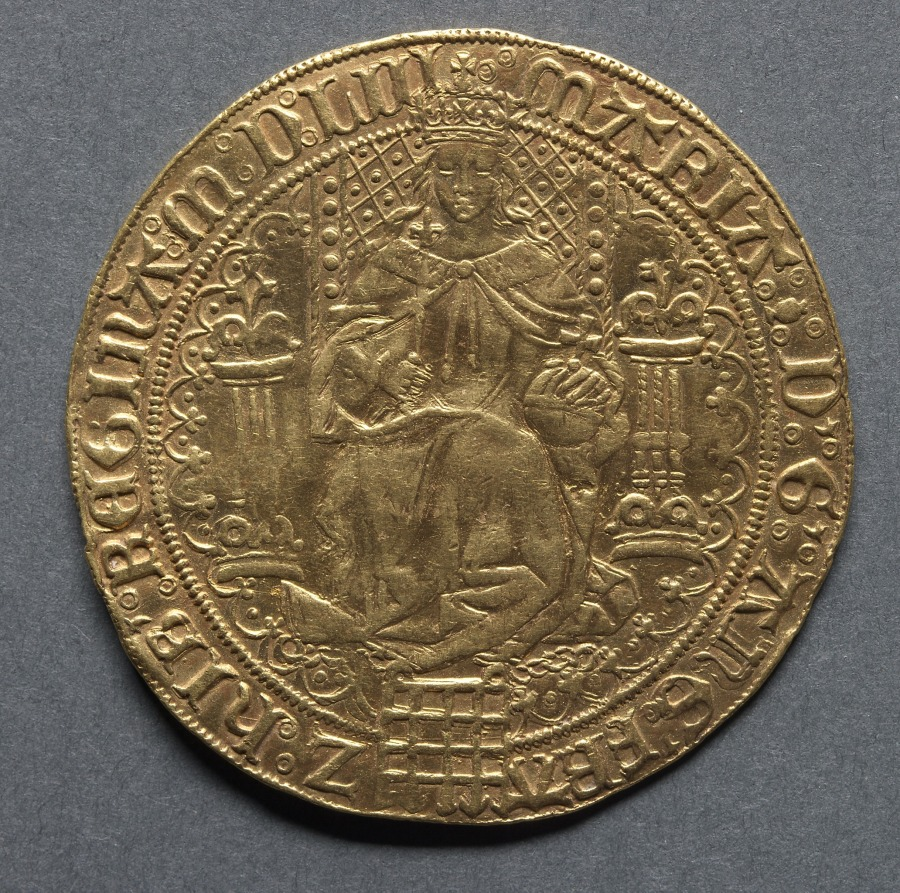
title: Sovereign: Mary Enthroned (obverse); Shield of Royal Arms on a Tudor Rose (reverse)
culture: England, Mary, 1553-1554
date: 1553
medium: gold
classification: Coins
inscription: MARIA: D': G': ANG'. FRA Z: HIB': REGINA: m:D:LIII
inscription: A DNO FACTV EST ISTV Z EST MIRA IN OCVL NRIS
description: Upon ascending the throne, Mary announced that she would restore the coinage to its full value. This sovereign of thirty shillings is of standard gold, 23 carats, 3 1/2 grains. The fine silver pieces of the reign were in metal, 11 oz. fine. These coins are thus of the same fineness as were those of Edward VI; the silver is, in fact, 1 dwt. poorer. This coin is rare and similar to another in the collection from Edward VI, 1969.177. Mary I was the only Tudor monarch to include dates on a sovereign. Roman numerals at the end of the obverse inscription read 1553.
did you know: Mary I, Queen of England from 1553–58, was also known as Mary Tudor, and as "Bloody Mary" to her opponents.